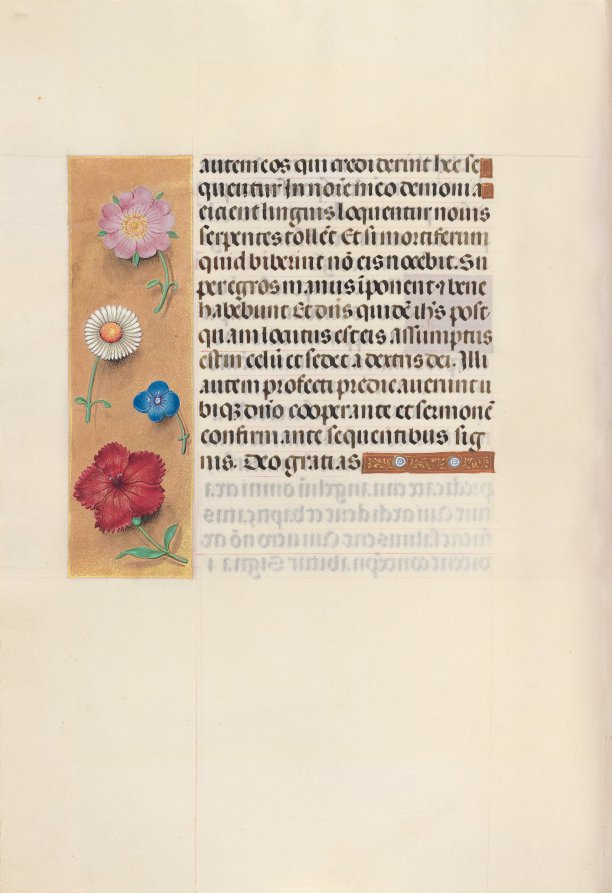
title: Hours of Queen Isabella the Catholic, Queen of Spain: Fol. 96v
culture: Flanders, Ghent and Bruges, late 15th century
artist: Master of the First Prayerbook of Maximillian (Flemish, c. 1444–1519)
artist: and Associates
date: c. 1500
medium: ink, tempera, and gold on vellum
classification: Bound Volume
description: This manuscript was illuminated by a circle of at least five highly organized manuscript painters active in the Flemish cities of Ghent and Bruges. The principal illuminator was Alexander Bening, who painted the majority of the book's miniatures. Manuscripts produced by this circle of artists are renowned for the decoration of their borders, which typically feature a rich variety of realistically-painted flowers, birds, and butterflies. This prayer book, called a book of hours, was intended not for a cleric, but for the private devotions of a lay person-in this case, Isabella the Catholic, Queen of Spain (1451-1504). Isabella's coat of arms embellishes the book's frontispiece. It is unlikely that the book was commissioned by the Queen herself; rather, she probably received it as a diplomatic gift from someone courting her patronage, perhaps Cardinal Francisco Jimenez de Cisneros. A Franciscan friar, Jimenez was dependent upon Isabella for his advancement, first to the post of Queen's confessor in 1492, and then to Archbishop of Toledo in 1495.